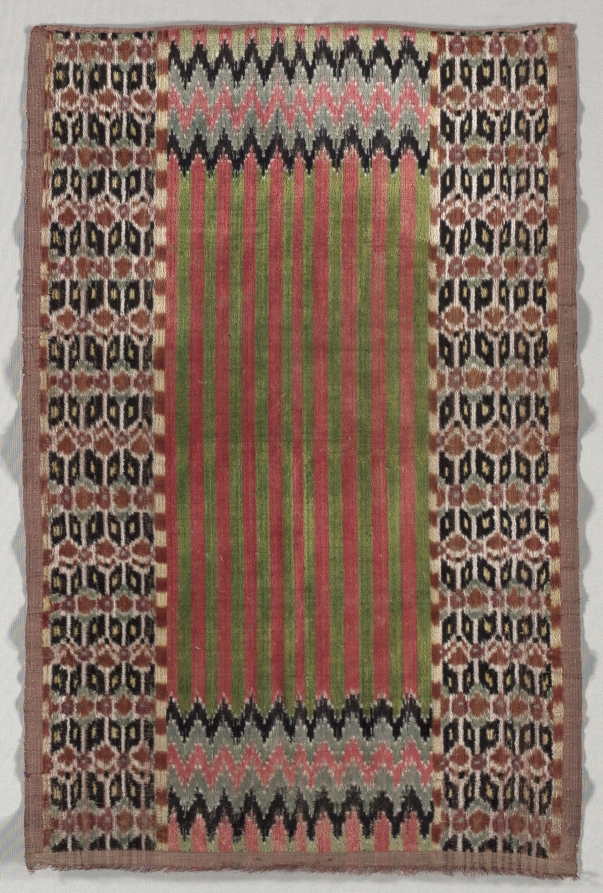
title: Velvet Panel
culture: Iran, 19th century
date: 1800s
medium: velvet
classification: Velvet